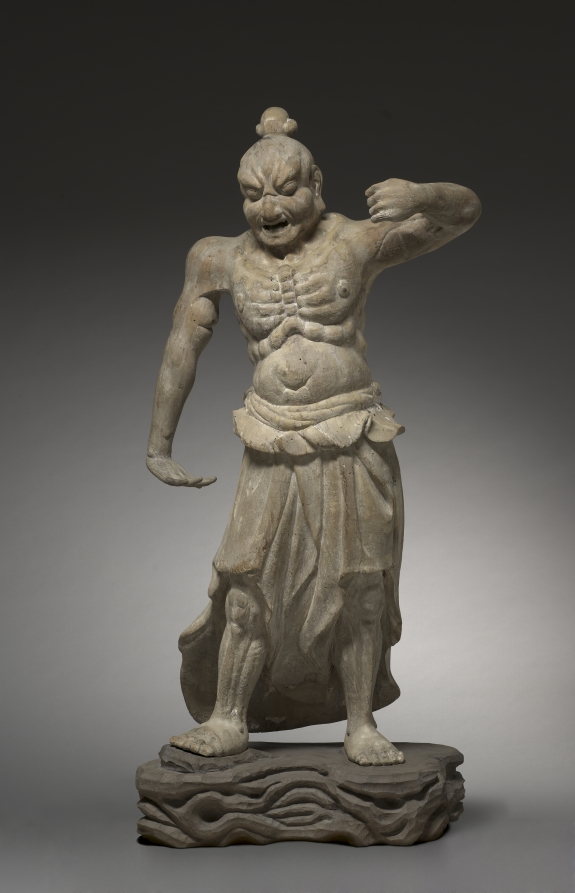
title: Guardian Figure: Nio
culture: Japan, Kamakura period (1185–1333)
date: 1200s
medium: chestnut and cypress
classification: Sculpture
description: Paired with a closed-mouth Nio, this figure originally protected the entrance of a Buddhist temple in Japan. Sculpted in an expressive, dynamic style, this figure was created using several pieces of wood carefully joined together. This imposing figure was originally painted, though is substantially faded due to weathering. The carved wooden bases for the two guardian figures on display are modern replacements.